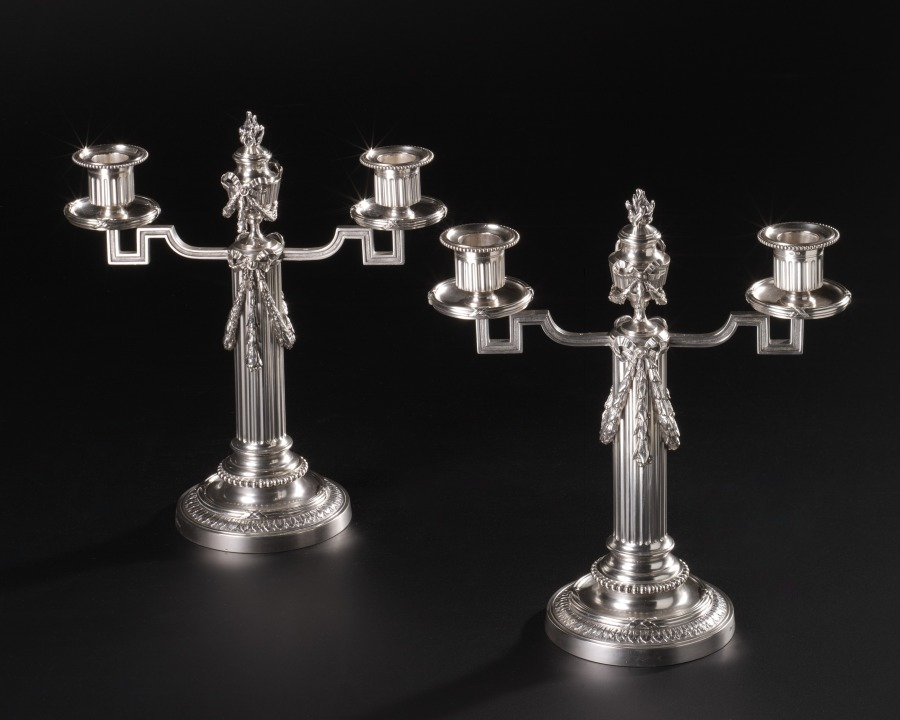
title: Pair of Candelabra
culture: Russia, St. Petersburg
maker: House of Fabergé (Russian, 1842–1918)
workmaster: Julius Alexandrovitch Rappoport (Russian, 1864–1916)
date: 1887–90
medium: silver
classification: Silver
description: This pair of candelabra demonstrates Fabergé’s commitment to a commercial balance between decorative and functional design. The pair was made by Fabergé’s chief silversmith, German-born Julius Rappoport, in Moscow, where the majority of gold and silver objects were crafted. Small in size, the pair may have been used in more intimate settings, as opposed to larger banquets or public gathering areas.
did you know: The design reflects the resurgence of the neoclassical style in the late 1800s.